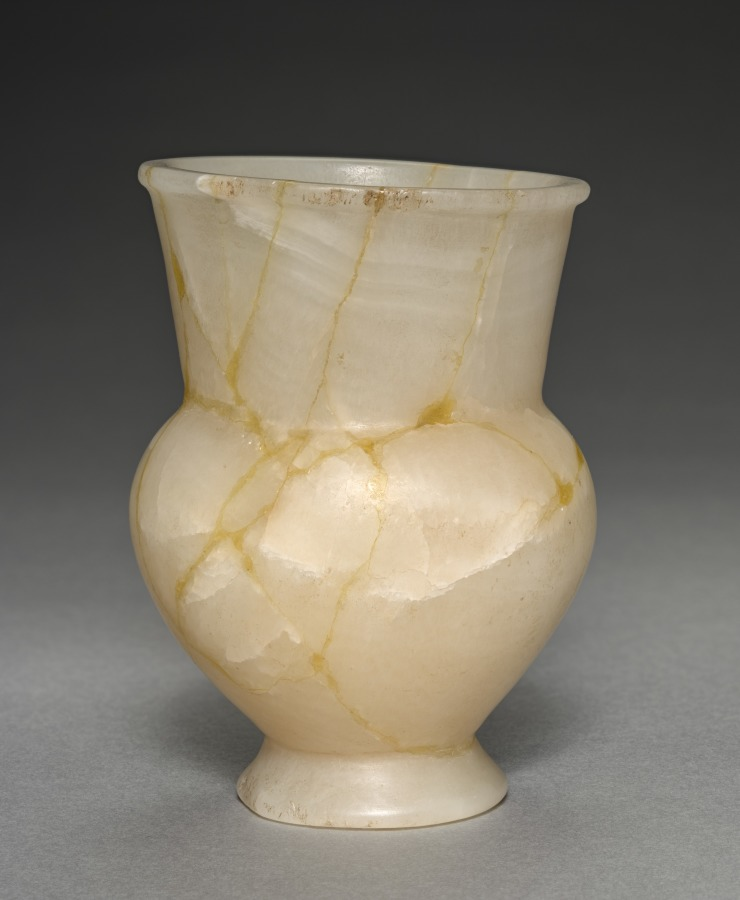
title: Long-Necked Flask (Krateriskos)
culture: Egypt, New Kingdom (1540–1069 BCE), Dynasty 18, reign of Tuthmosis III (1479–1425 BCE)–reign of Amenhotep III (1390–1352 BCE)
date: 1540–1296 BCE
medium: travertine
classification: Vessels